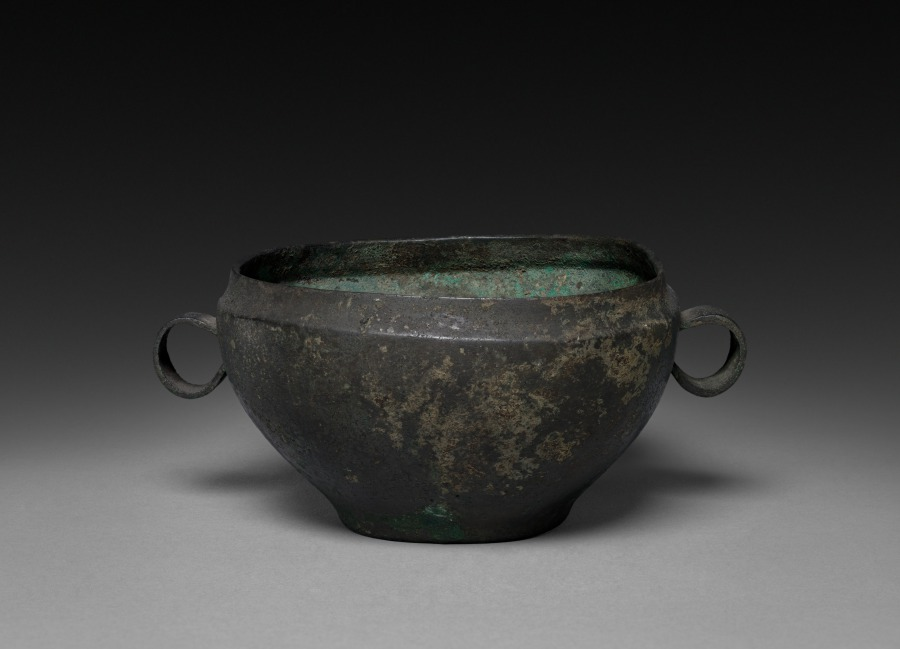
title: Bronze Dish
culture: China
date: before 1915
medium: bronze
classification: Metalwork